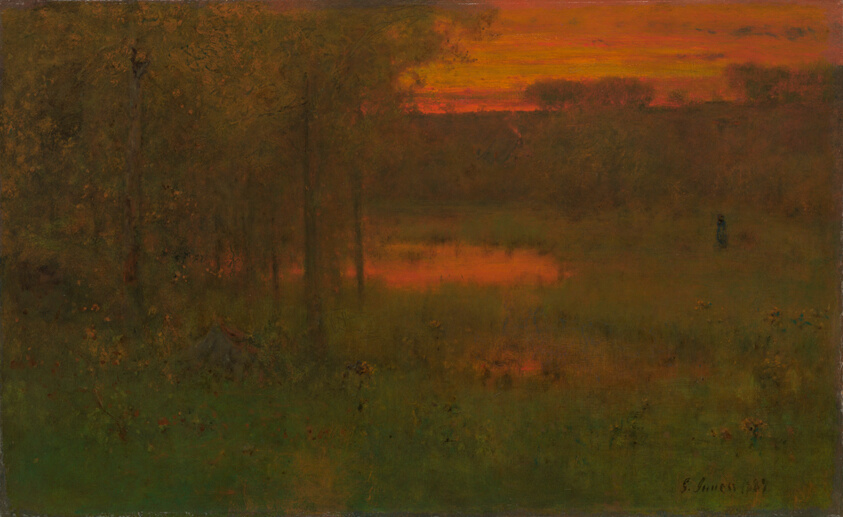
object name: Painting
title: Landscape, Sunset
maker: George Inness (American, 1825–1894)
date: 1887–89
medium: Oil on canvas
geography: United States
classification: painting; american arts